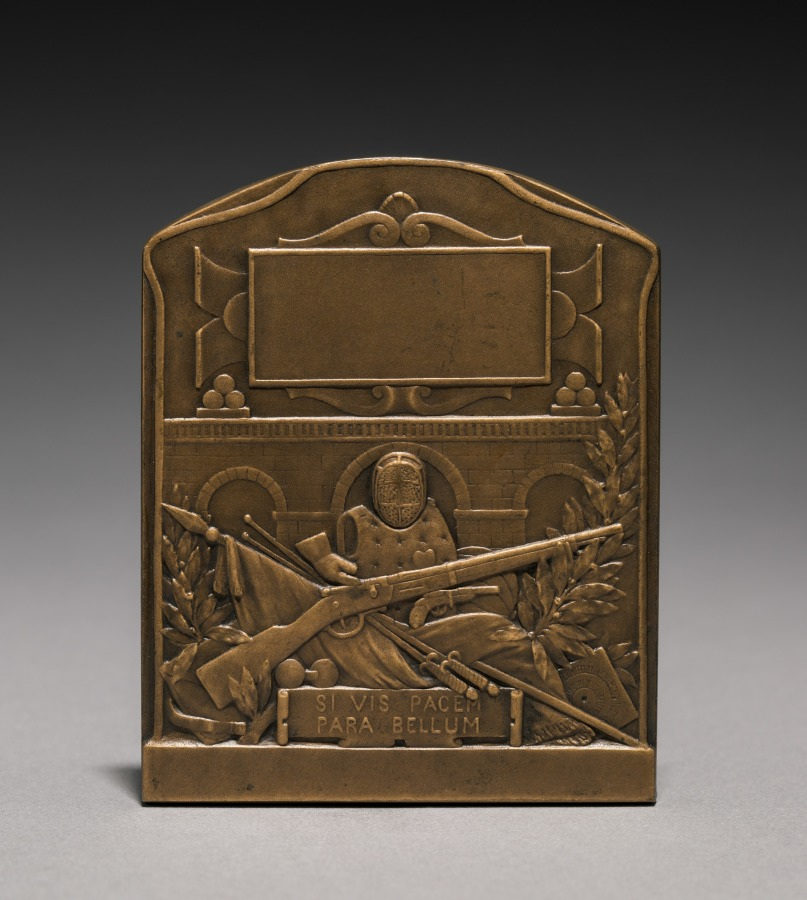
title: Medal (reverse)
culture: France, 20th century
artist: Emile André Boisseau (French, 1842–1923)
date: 1914–1918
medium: bronze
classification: Metalwork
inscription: "si vis pacem para bellum."